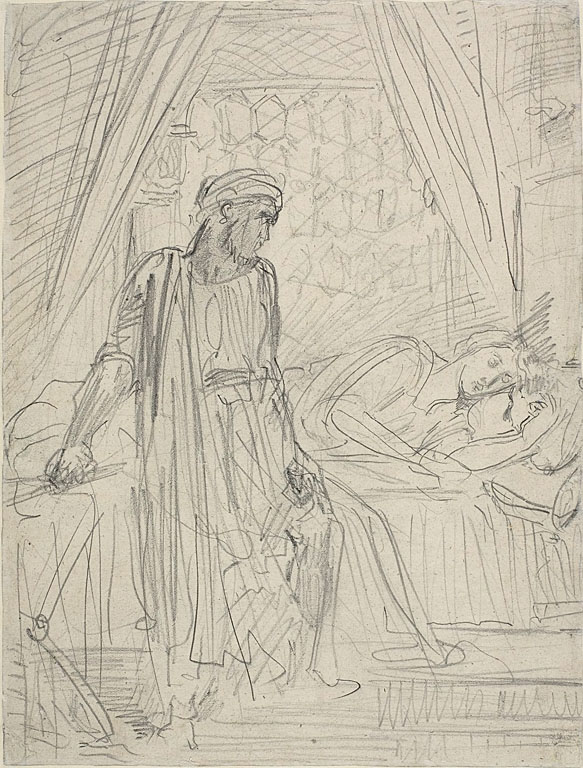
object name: Drawing and Watercolor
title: Othello's Speech to the Senators of Venice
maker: Théodore Chassériau (French, 1819-1856)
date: c. 1844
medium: Graphite on ivory wove paper, permeter mounted on cream laid paper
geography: France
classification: graphite; drawings (visual works); prints and drawing